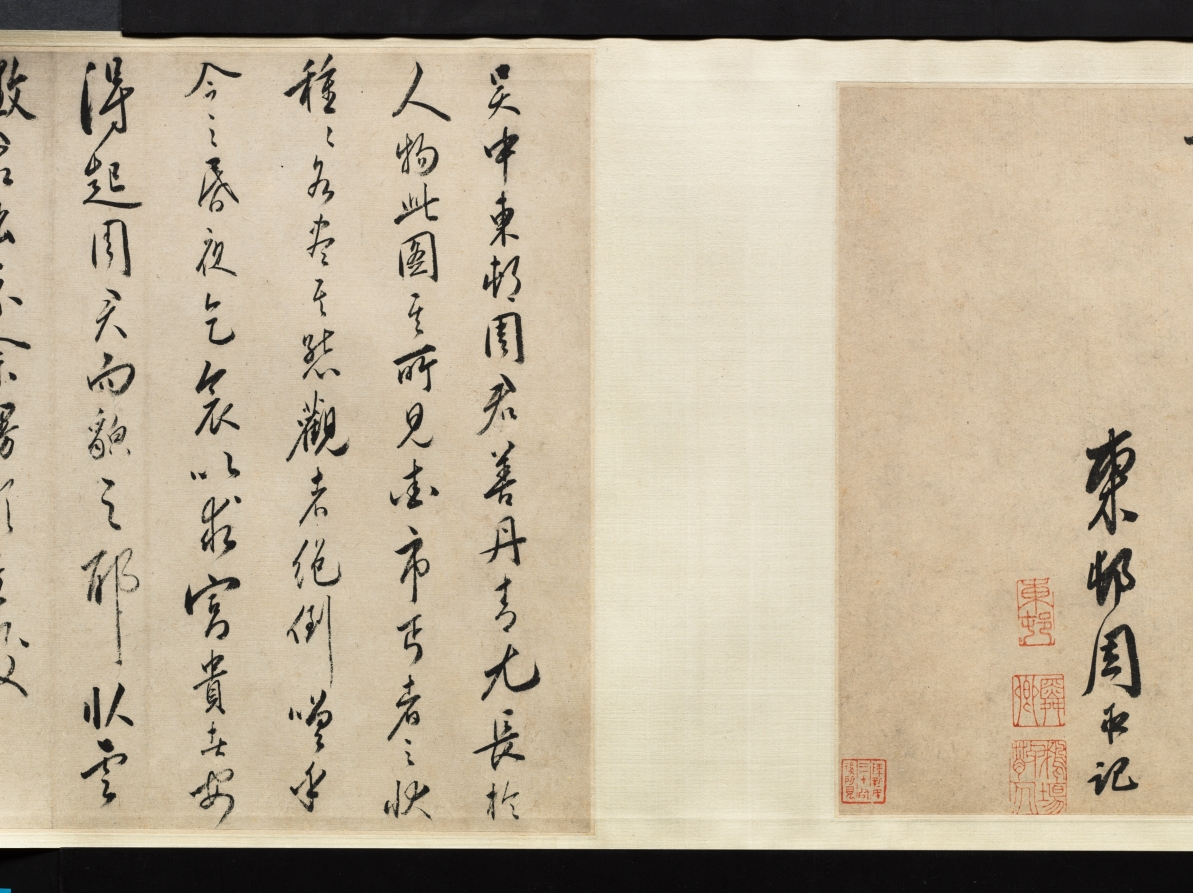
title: Beggars and Street Characters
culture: China, Ming dynasty (1368–1644)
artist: Zhou Chen (Chinese, c. 1450–c. 1536)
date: 1516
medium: Handscroll; ink and light color on paper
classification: Painting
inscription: 題: 周臣流氓圖. 古堇趙鶴琴 [印] 老鶴臨池; 鵝池軒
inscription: 正德丙子秋七月，閒窗無事 ，偶記素見市道丐者種種態度。乘筆硯之便，率爾圖寫。雖無足觀，亦可以助警勵世俗云。 東邨周臣記 [印]東邨; 舜卿; 鵝場散人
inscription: 吳中東邨周君，善丹青，尤長於人物。此圖其所見盛市丐者之狀種種，各盡其態，觀者絕倒。嗟乎，今之晝夜乞哀以求富貴者，安得起周君而貌之耶。臥雲徵君出示，余漫題其後。 甲子歲十月吳門黃姬水 [印] 士雅山人; 另一印不詳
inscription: 是冊凡數種。其飢寒流離疲癃殘疾之狀，種種之異。觀此而不惻然心傷者，非仁人也。計正德丙子逆瑾之流毒已數年。而[江]彬 [錢] 寧輩肆虐方熾。意分符剖竹諸君，亦鮮有能撫字其民者。然則舜卿此作，殆與鄭君 流民圖同意。其有補於治道者不淺，要不可以墨戲忽之也。 長洲張風翼題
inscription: 東村此筆，蓋圖寫飢寒乞丐之態，以警世俗耳。而質山 [黃姬水]欲其寫昏夜乞哀，而靈墟[張鳳翼]則擬之於安上門圖。二君之見，其各有所指哉。昔唐六如每見周筆，輒稱曰：周先生！蓋深服其神妙之不可及。若此冊者，信非他人可能而有符於六如之心伏矣。豈易得耶。若黃、張之指，則又論於畫之外，不在於形似筆墨之旨也。 萬歷丁丑十二月三日 茂苑文嘉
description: Zhou Chen from Suzhou provides rare depictions of impoverished people that once filled the city’s markets and streets. Despite Suzhou’s prosperity, its rapid growth polarized society, including the wealthy and those who had deserted their farmlands, who were without homes, unemployed, or sick. Amid these are figures who inspire fear rather than empathy. The painting may thus be informed by local practices at the end of the lunar year, in which street beggars, in exchange for food or money, would dress up like ghosts and demons to drive out evil forces.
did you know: Although Zhou Chen's original composition was an album of 24 figures, today it is mounted as two handscrolls, one in the Cleveland collection and one in the Honolulu Museum of Art.